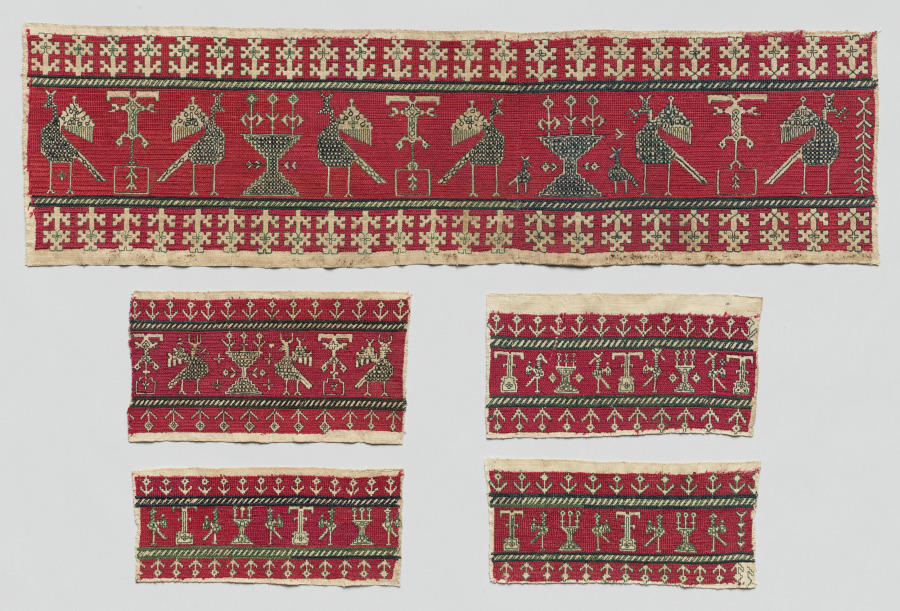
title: Five fragments of a furnishing textile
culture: Africa, North Africa, Morocco, Azemmour, Moroccan embroiderer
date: 1700s–1800s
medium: Linen, silk, dye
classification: Embroidery